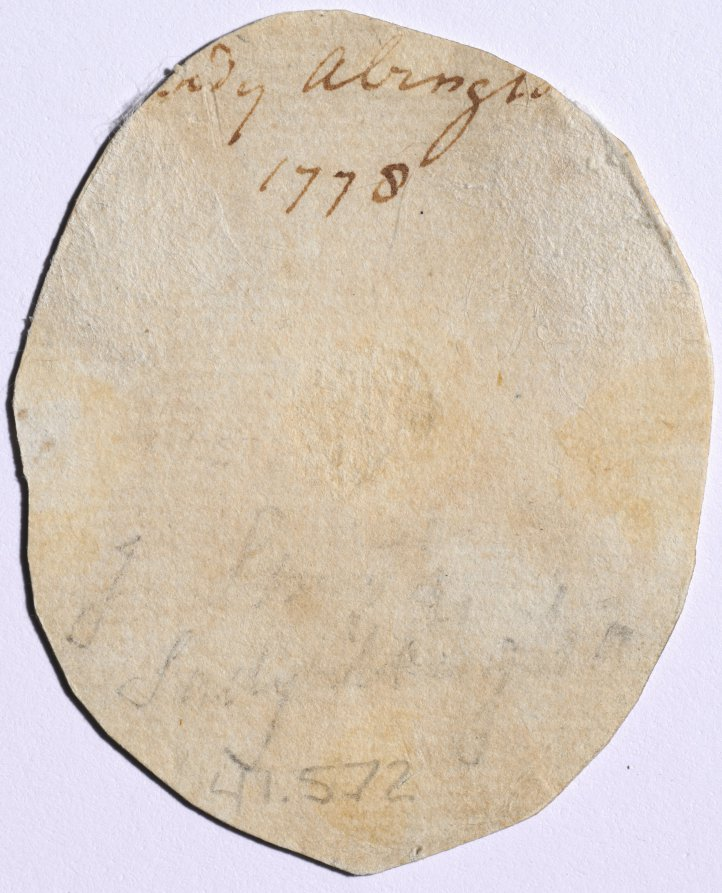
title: Portrait of Charlotte Bertie, née Warren, 4th Countess of Abingdon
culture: England, 18th century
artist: John I Smart (British, 1741–1811)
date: 1778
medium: graphite and wash on laid paper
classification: Portrait Miniature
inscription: inscribed on verso of paper to top in brown ink: [L]ady Abingto[n] 1778; inscribed at bottom of verso in graphite: J Smart / Lady Abington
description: Although it is impossible to say if it was always part of the artist’s process to execute a preparatory sketch prior to painting each miniature, we do know that John Smart retained many hundreds of these sketches. A group of preparatory sketches—of which this portrait is one—descended through the Smirke family after Smart’s daughter Sarah gave a sketchbook containing preparatory portrait studies to her friend Mary Smirke, sister of the celebrated Victorian architect Sydney Smirke. This book was probably broken up around 1877 when it was divided between Sydney’s daughters Mary Jemmett and Mrs. Lange, whose portions were both sold at auction in 1928. G. C. Williamson was the first to suggest that Smart’s sketches were well known and that they were preparatory studies for the painted miniatures. Williamson listed the names of sitters from the sketches known to him at the time, and they included Lady Abingdon. Here, Lady Abingdon’s head and shoulders face right. Her brown hair is dressed high on her head, and a strand of pearls is woven through the left side of her coiffure. A veil descends from the top of her head, past her shoulders. She has gray eyes. Compared to his contemporaries George Engleheart (1752–1829) and Andrew Plimer (1763–1837), whose female sitters were often painted in similar simple white gowns, Smart often lavished more attention on the costumes in his portraits of women, whose dresses incorporated colored silks, printed fabrics, and luxury trimmings like lace and fur. Thus, Lady Abingdon wears a low-necked, pink dress trimmed with ermine and strands of pearls. The background is unpainted. The removal of the paper backing revealed an inscription in brown ink, written in Smart’s hand, dating the work and verifying the identity of the sitter as Lady Abingdon. Lady Abingdon (d. 1799) was the daughter of Admiral Sir Peter Warren, K.B., M.P. She married Willoughby Bertie, 4th Earl of Abingdon, in 1768. They had six children, two of whom died very young. It is for Lady Abingdon that Abingdon Square in New York City is named, courtesy of her father, who had purchased 300 acres of land in Greenwich Village in 1744. Her husband’s famous protestations against the British government’s treatment of America during the War for Independence ensured that even in 1794, when the New York city council was rooting out British names from public streets and spaces, the name of Abingdon Square was retained. The family was painted by some of the great artists of the day, including Nathaniel Dance-Holland (1735–1811) and John Francis Rigaud (1742–1810). The formal portrait of 1769 by Dance-Holland, in which Lady Abingdon is depicted in coronation robes and holding her peeress’s coronet, conveys the pomp and tradition expected from a marriage portrait of a powerful peer. But even Smart’s miniature portrait sketch of almost a decade later maintains some of this grandeur, depicting the countess with aristocratic bearing and wearing the rich ermine-trimmed gown to which her station entitled her. A miniature on ivory corresponds to this preparatory sketch, although it is dated 1777, suggesting that the sketch may have been executed the following year in preparation for a second version of the portrait. There are slight differences in the details of the dress, particularly the left sleeve—which has been lengthened—and a slight reduction in pearl and ermine trim. The portrait on ivory also has somewhat more softness in the facial features, but many of the details, including the veil and the lock of hair on the right shoulder, are extremely similar. The miniature’s current location is unknown.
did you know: Sketches helped John Smart work out the particulars of a portrait before commencing the miniature on ivory, and they were useful in the event that a duplicate might later be required.